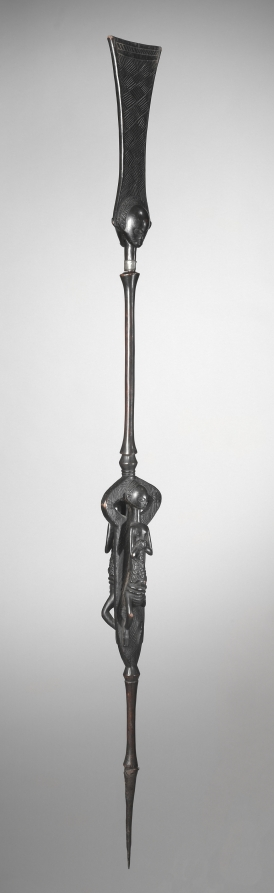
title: Staff of Office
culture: Central Africa, Democratic Republic of the Congo, Luba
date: early to mid-1800s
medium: Wood and iron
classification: Sculpture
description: Sanctified by a ritual specialist and enhanced with medicinal substances, the staff possessed supernatural qualities and was endowed with healing power. Luba staffs are among the most important regalia of Luba kings. The metal point alludes to the kingdom's stability and durability. Each staff has its own distinctive iconography to reflect regional styles. As Chief Msidi (former owner of this staff) ruled over the Yeke kingdom (and not the Luba kingdom), it begs the question of how he acquired this symbol of another realm's power.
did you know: The Yeke kingdom ruler Chief Msidi gave this as a gift of appreciation to the British missionary Frederick Stanley Arnot, whom the chief had invited to his kingdom.